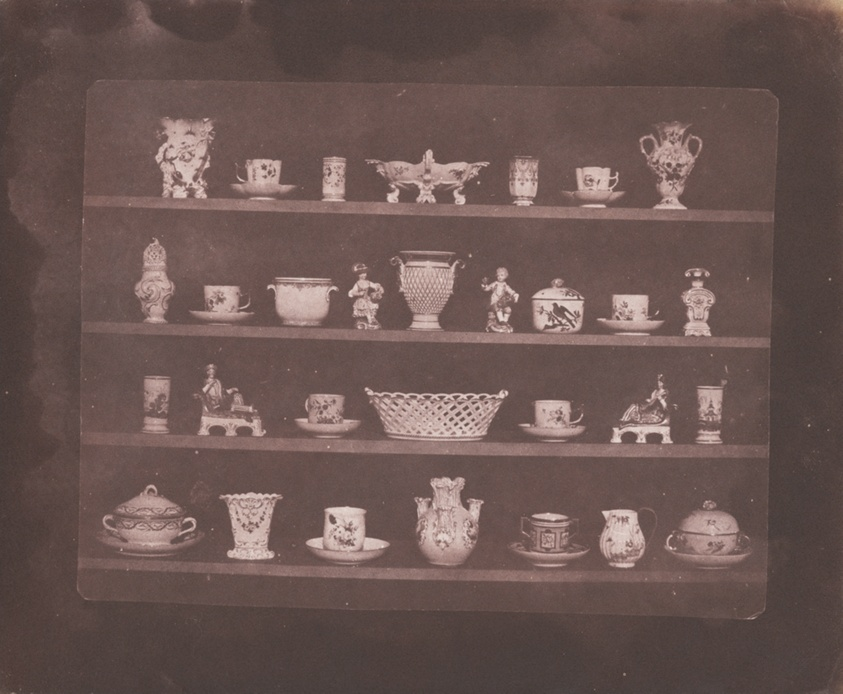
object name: Photograph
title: Articles of China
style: 19th century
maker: William Henry Fox Talbot (English, 1800-1877)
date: 1843-44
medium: Salted paper print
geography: England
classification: photograph; photography